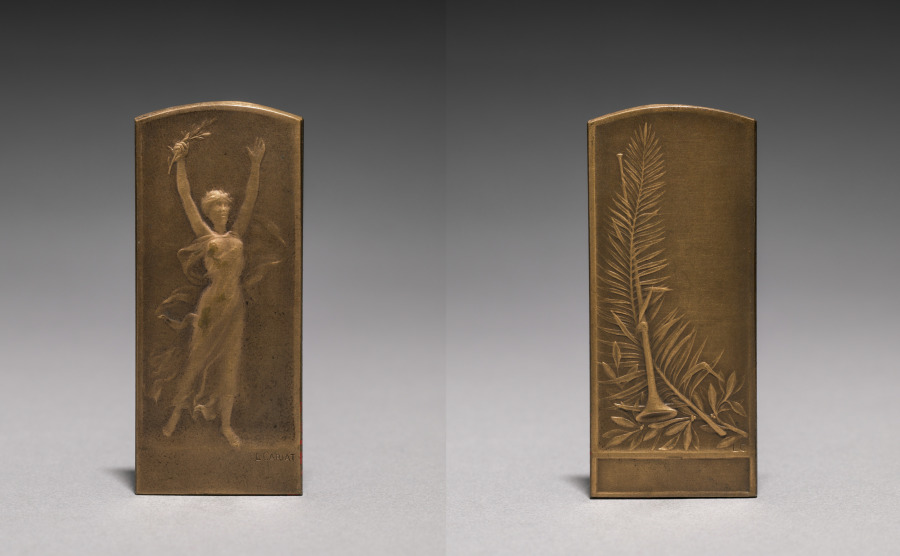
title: Medal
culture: France, 19th century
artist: Lucien Julien Henri Cariat (French)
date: c.1900–1925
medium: bronze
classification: Metalwork